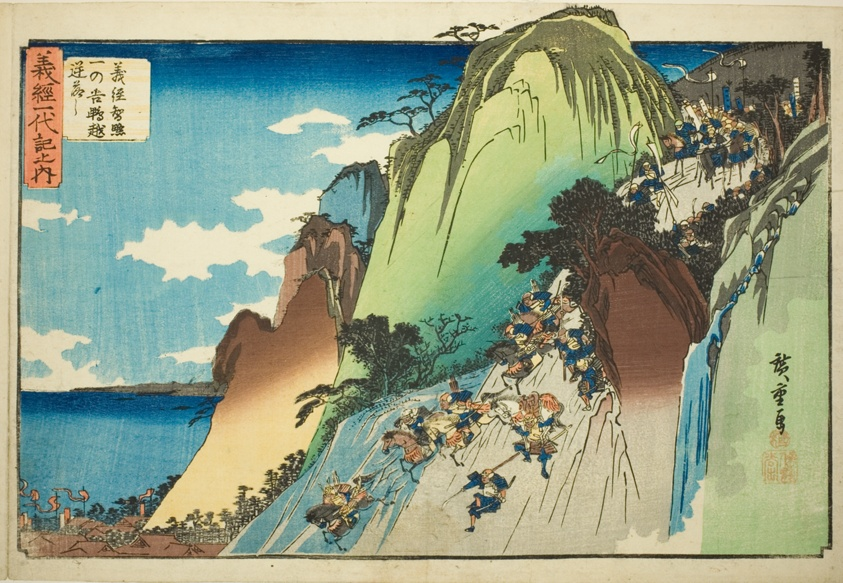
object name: Print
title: No. 4: Yoshitsune Leading His Cavalry Down Hiyodori Pass at Ichinotani (Yonkai, Yoshitsune chiryaku Ichinotani Hiyodori-goe saka otoshi), from the series "The Life of Yoshitsune (Yoshitsune ichidaiki no uchi)"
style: Japanese (culture or style)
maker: Utagawa Hiroshige 歌川 広重; Japanese, 1797-1858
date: c. 1832/34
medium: Color woodblock print; oban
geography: Japan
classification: woodblock print; print; asian art